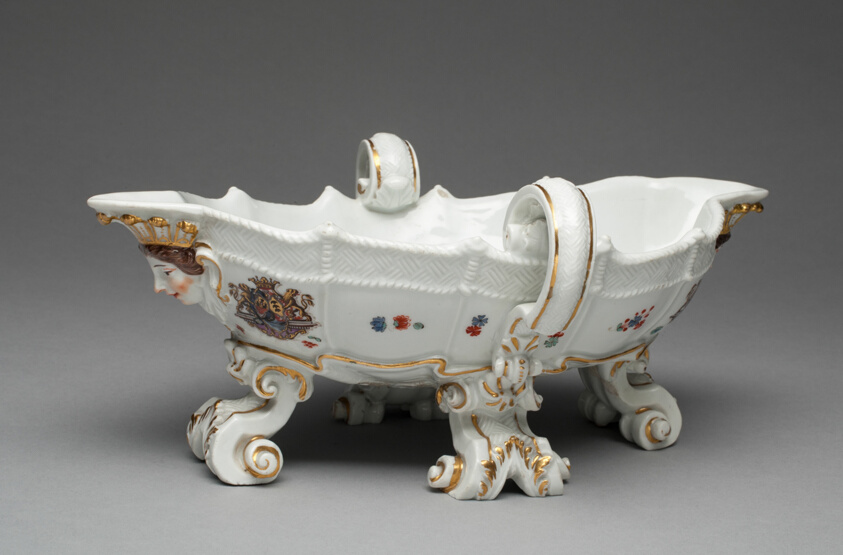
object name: Ceramics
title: Sauceboat from the Sulkowsky Service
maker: Meissen Porcelain Manufactory (German, founded 1710)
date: 1735–38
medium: Hard-paste porcelain, polychrome enamels, and gilding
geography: Germany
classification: tableware; european decorative arts; ceramics